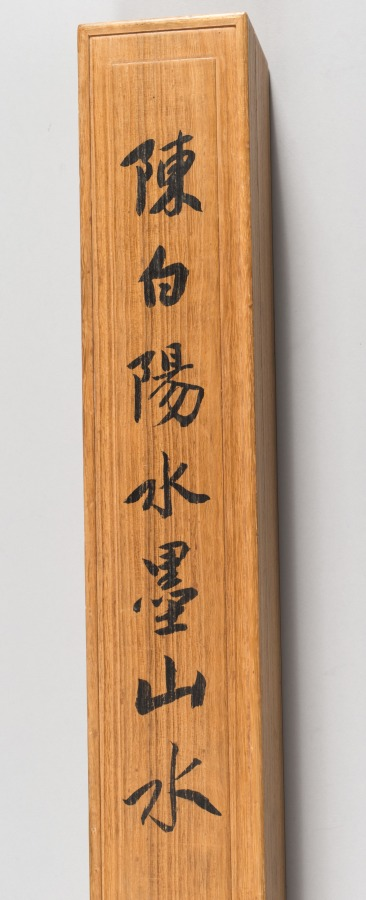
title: Looking for a Monastery in the Misty Mountains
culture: China, Ming dynasty (1368–1644)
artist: Chen Chun (Chinese, 1483–1544)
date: 1500–1544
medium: hanging scroll, ink on paper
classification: Painting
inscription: Artist's inscription, signature, and 2 seals: Row after row of misty trees envelop the Buddhist Monastery./ But the rustic who comes to find it will not lose his way./ Just across the wooden bridge, the dusty world is cut off;/ Among the countless falling petals, birds are singing confusedly. Daofu 道複 composed [this]. [seals] Fufu shi 復甫; Baiyang shanren 白陽山人. trans. WKH/LYSL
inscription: 3 additional unidentified seals.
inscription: 1 additional unidentified seal on the back of the mounting.